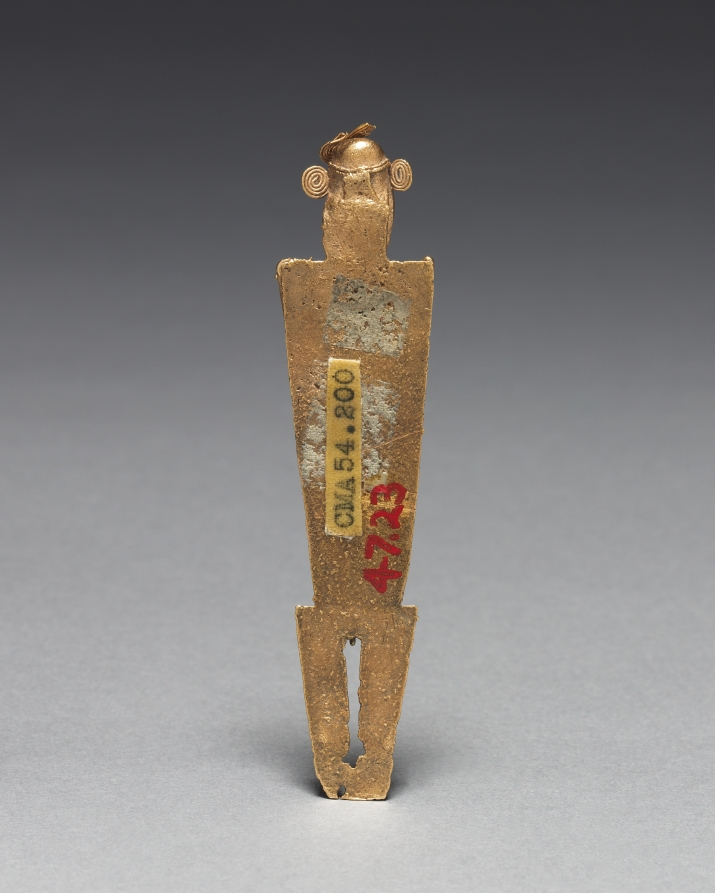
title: Tunjos (Votive Offering Figurine)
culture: Colombia, Muisca style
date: c. 900–1550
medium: cast gold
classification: Metalwork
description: Unlike the other gold ornaments made in the isthmian region, tunjos were not worn; instead, they served as offerings that were deposited in sacred places such as lagoons and caves. They often depict humans who hold something. Perhaps because they were not meant for display, tunjos were not finished after lost-wax casting. Flaws remain uncorrected, surfaces are unpolished, and gold that backed into the channel used to pour the molten metal into the mold was left in place.